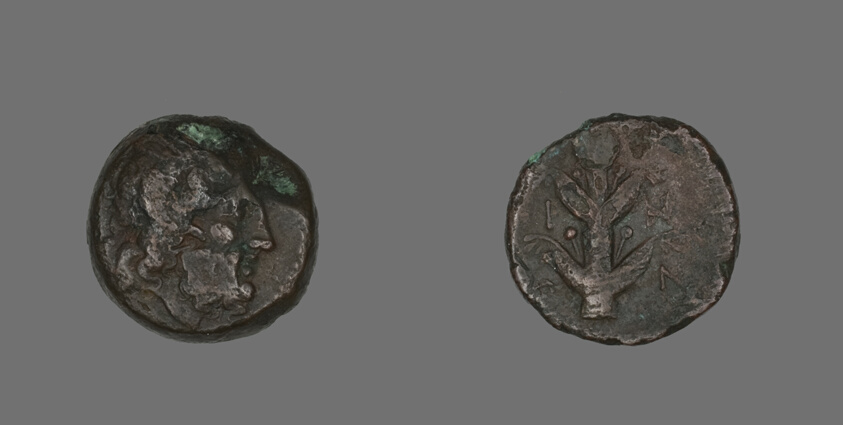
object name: Coin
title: Coin Depicting the God Zeus Ammon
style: phoenician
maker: Greek; Cyrenaicia, North Africa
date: 247-221 BCE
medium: Bronze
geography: Shahhat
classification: coin; ancient art; struck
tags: zeus